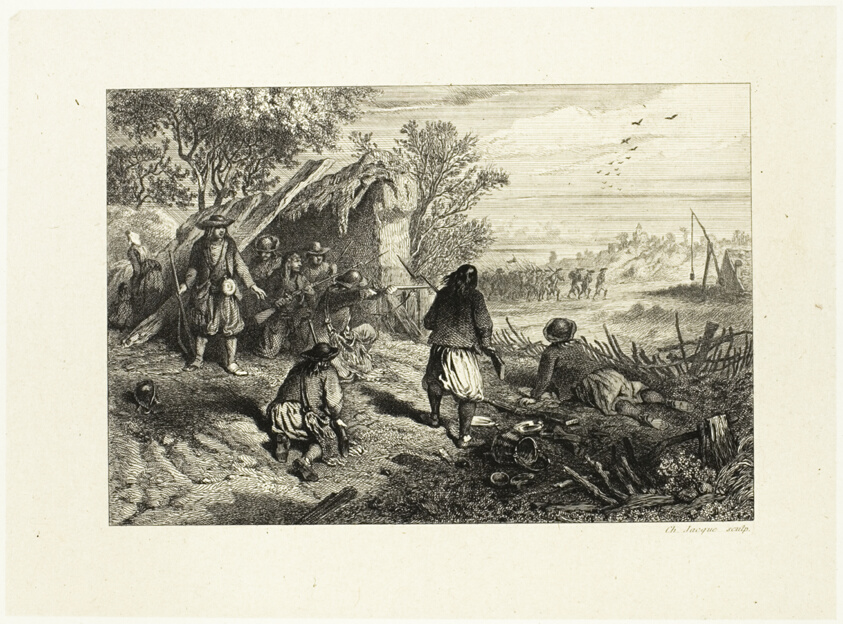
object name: Print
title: An Ambush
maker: Charles Émile Jacque (French, 1813-1894)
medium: Etching, engraving, drypoint and roulette on cream China paper laid down on ivory wove paper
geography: France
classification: etching; print; prints and drawing